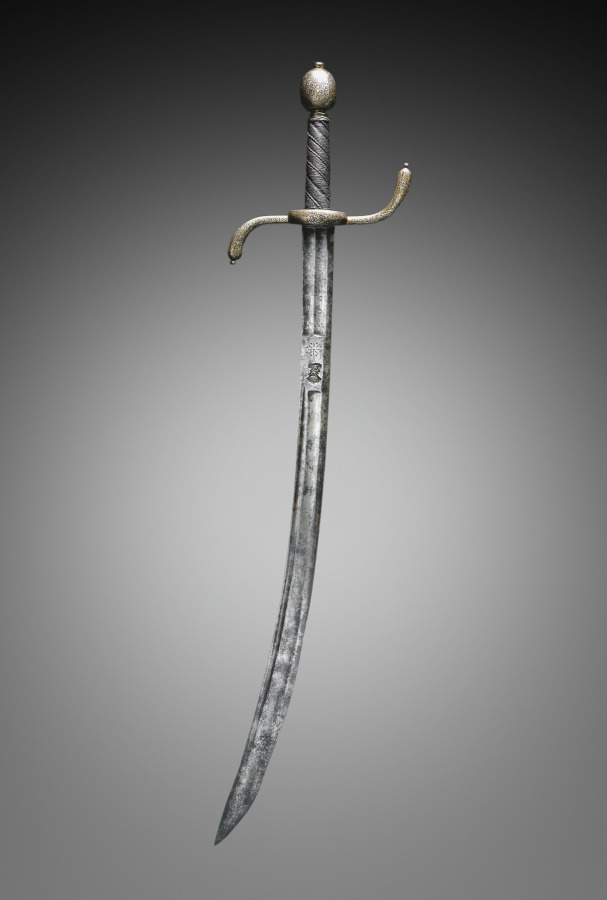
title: Hanger (Hunting Sword)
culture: Hilt: Italy (?); Blade: Germany, Saxony, late 16th-17th Century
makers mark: Jaspar Bongen the Younger (German, active late 1600s)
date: late 1600s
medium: steel; gold and silver damascened hilt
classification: Arms and Armor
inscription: "1553" (Presumed to be a commemorative date)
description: Damascening, the technique of hammering gold and silver wires into grooves cut to receive them, enlivens this sword's hilt. Further texture was added with wires to improve the user's grip, which allowed him to hunt with more control and accuracy. Hunting was a popular sport among the wealthy and many nobles owned tracts of forest, but peasants were prohibited from hunting on these lands.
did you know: The swordsmith's mark, a crowned stag visible on the blade below the hilt, is unidentified.